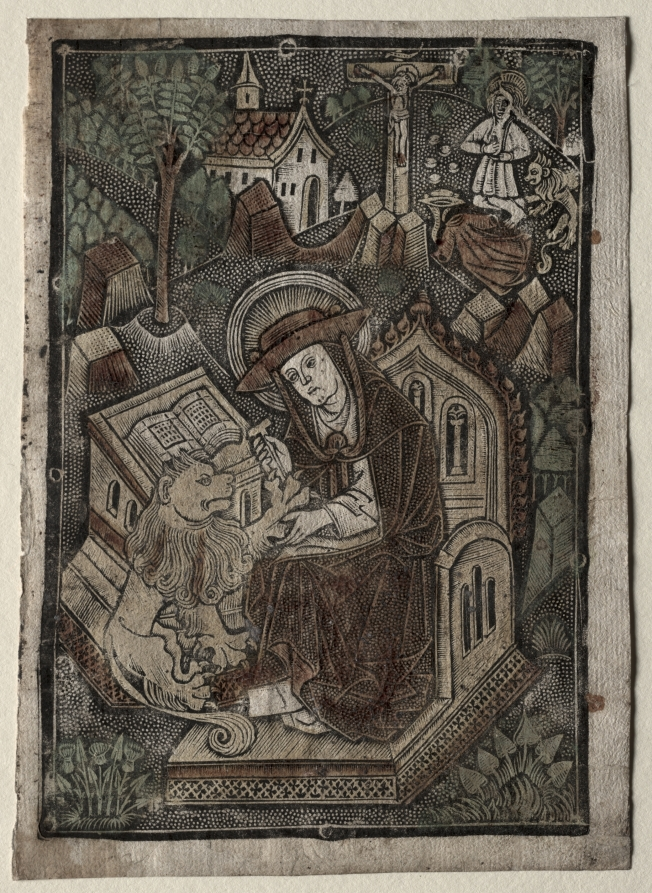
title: St. Jerome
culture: Germany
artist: workshop of Kölner Wappenschild (German)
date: 1500s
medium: engraving, hand-colored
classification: Print